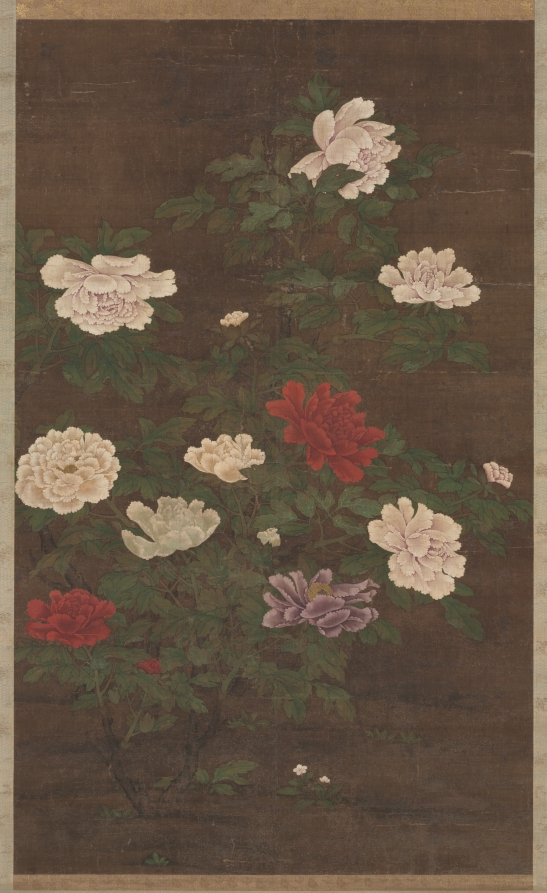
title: Peonies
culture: China, Yuan dynasty (1271-1368)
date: late 1200s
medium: hanging scroll, ink and color on silk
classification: Painting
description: In China, the peony is considered the Queen of Flowers, representing the late spring season. The shrubs of this tree peony are in full bloom, blossoming in various colors. Peony paintings were popular from the Southern Song period to the Ming dynasty. The large scale of this decorative scroll suggests that it may have been hung in a reception hall, conveying good wishes for wealth and prosperity.